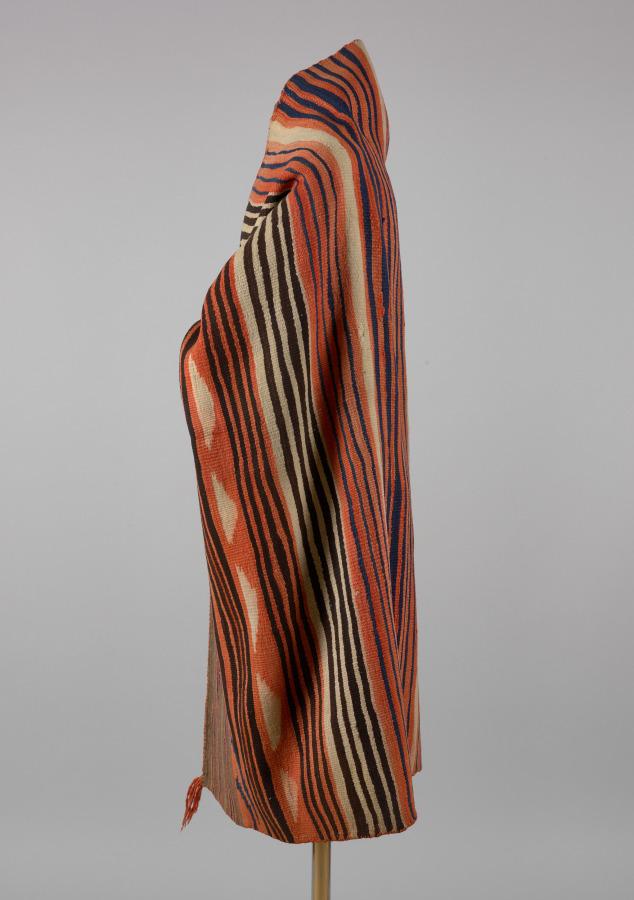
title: Banded Wearing Blanket (Diyugi)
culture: America, Native North American, Southwest, Diné (Navajo) or Zuni Pueblo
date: c. 1880–90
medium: Wool (handspun and bayeta): tapestry weave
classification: Textile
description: This blanket was created during the late 1800s, when weavers in the Southwest began to shift from making garments for Indigenous use, including trade, to additionally create items for non-Native collectors. In this new market, traditional wearing blankets, which were worn around the shoulders, were marketed as rugs.